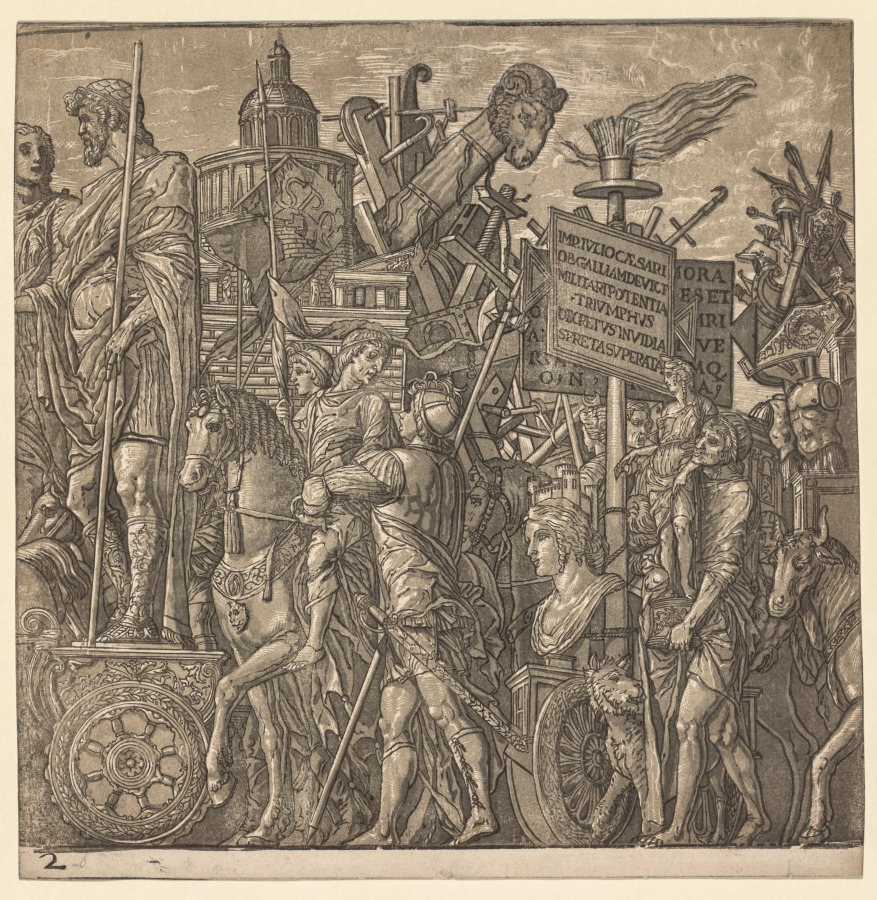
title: The Triumph of Julius Caesar: Colossal Statues and Siege Equipment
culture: Italy, 16th century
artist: Andrea Andreani (Italian, about 1558–1610)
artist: after Andrea Mantegna (Italian, about 1431–1506)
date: 1593–99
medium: chiaroscuro woodcut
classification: Print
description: Commissioned by Duke Vincenzo Gonzaga, this series of chiaroscuro woodcuts reproduces Andrea Mantegna’s Triumph of Julius Caesar, painted a century earlier. The scenes imaginatively portray the triumphal procession of the renowned Roman general and consul Julius Caesar following his successful defeat of Gaul in 52 BC. Each section of the continuous frieze shows elements typical of these parades, sanctioned by the Roman Senate and described in ancient texts. The printed suite’s frontispiece features a portrait bust of Mantegna, and the text below boasts that the famous paintings attracted many viewers. People who owned sets of these woodcuts often tacked them up to create a decorative frieze. Andreani issued the prints with a sheet of classical columns that could be cut out and placed between the scenes. Two fragments of these columns, colored orange, still flank the fourth scene.